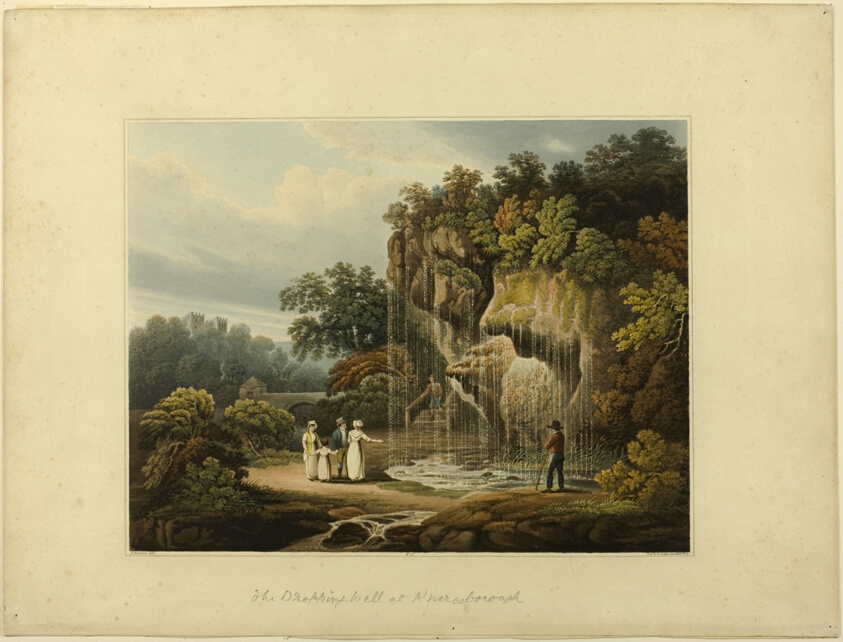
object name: Print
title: The Dropping Well at Knar Knarcsborough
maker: Francis Nicholson (English, 1753-1844)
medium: Color aquatint on paper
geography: England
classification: lithograph; print; prints and drawing